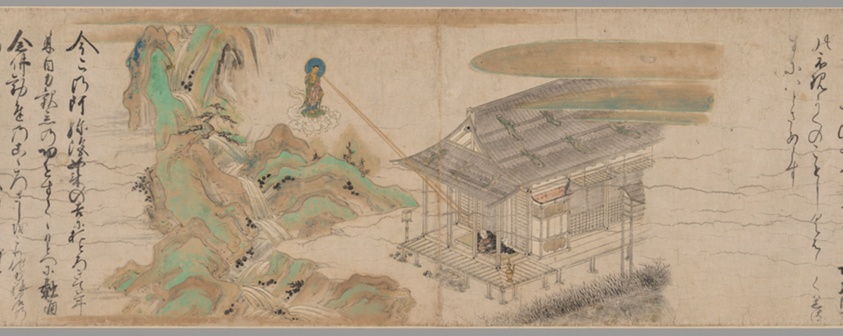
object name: Painting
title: Legends of the Yūzū Nembutsu Sect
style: Japanese (culture or style)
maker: Artist unknown; Japanese, active 14th century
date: Kamakura period (1185–1333), 14th century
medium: Handscroll; ink, colors, and gold on paper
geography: Japan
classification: handscroll; painting; asian art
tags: Buddhism, religion